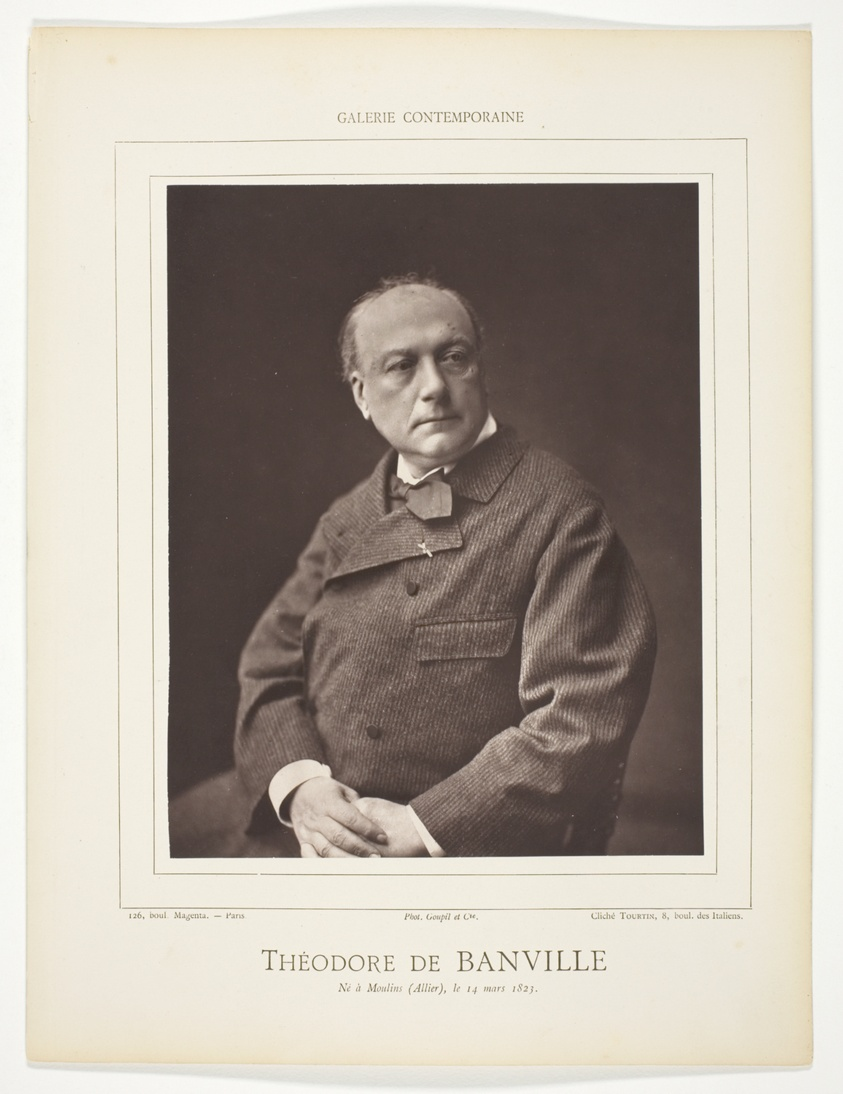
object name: Photograph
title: Théodore de Banville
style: 19th century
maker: Tourtin Tourtin; French, 19th century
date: c. 1876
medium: Woodburytype, from the periodical “Galerie Contemporaine Littéraire, Artistique” (1878), volume 5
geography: France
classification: woodburytype; photomechanical process; photography; photograph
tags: Collected by Hugh Edwards, Contemporaine Littéraire